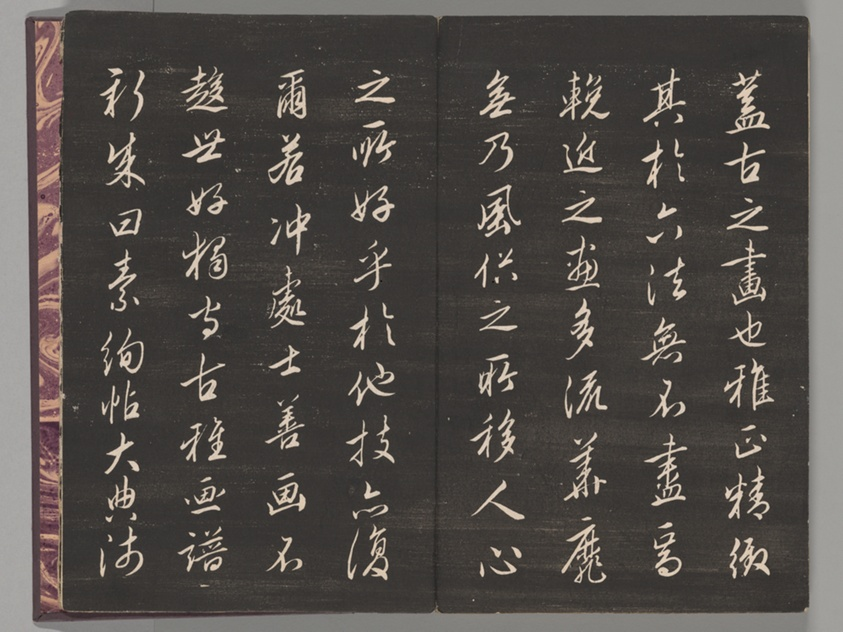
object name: Book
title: Soken sekisatsu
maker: Ito Jakuchu (Japanese, 1716-1800)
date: 1767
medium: Woodblock printed book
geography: Japan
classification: book